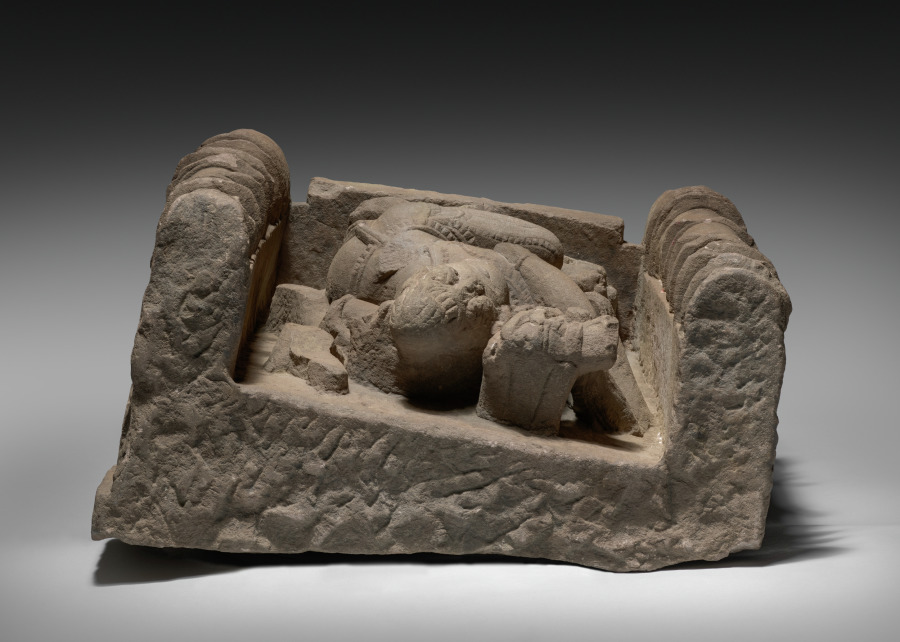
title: Eight Armed Shiva Dancing Between Two Pillars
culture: India, Rajasthan, Chandela Dynasty, 10th - 11th century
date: 900s–1000s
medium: sandstone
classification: Sculpture